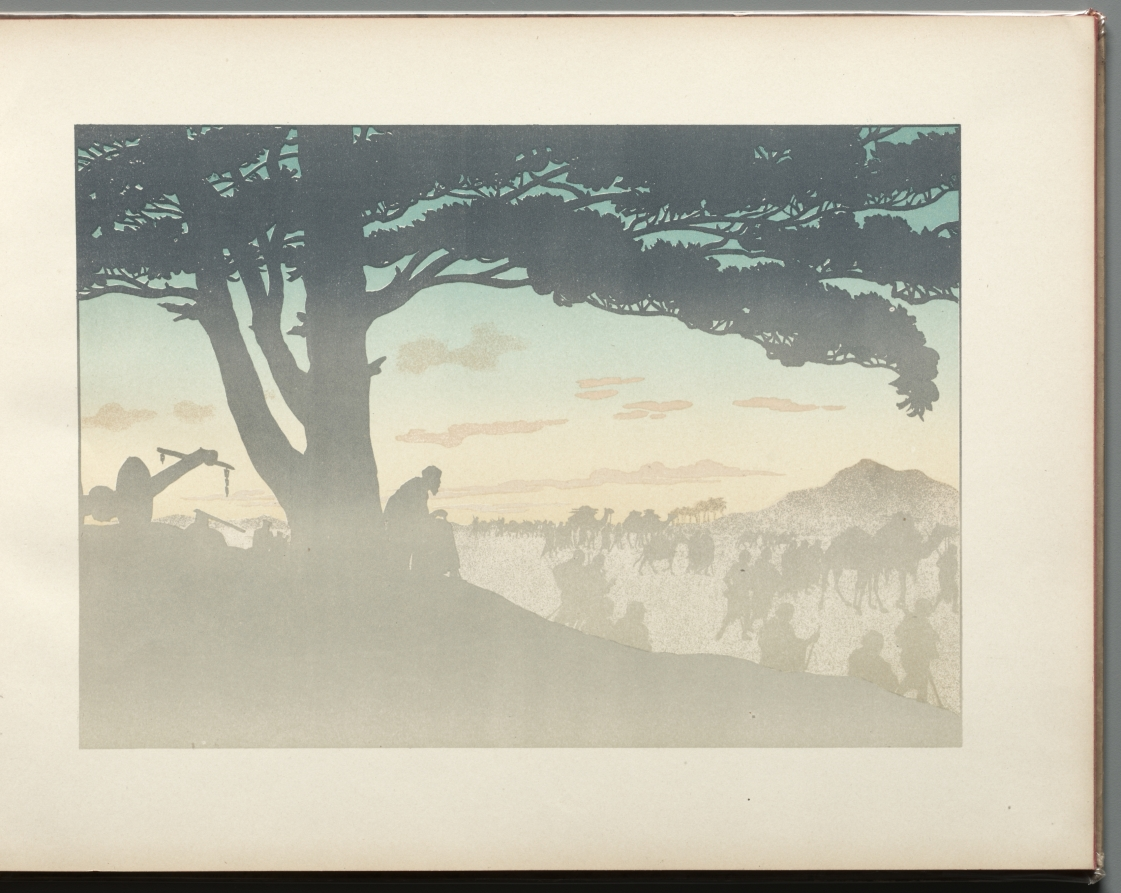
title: The Prodigal Son: page 15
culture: France, 19th century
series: Bound Volume illustrating the poetry and music of Georges Fragerolle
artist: Henri Rivière (French, 1864–1951)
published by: E. Flammarion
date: 1895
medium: 15 color lithographs in a bound volume illustrating the poetry and music of Georges Fragerolle: color lithograph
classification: Bound Volume